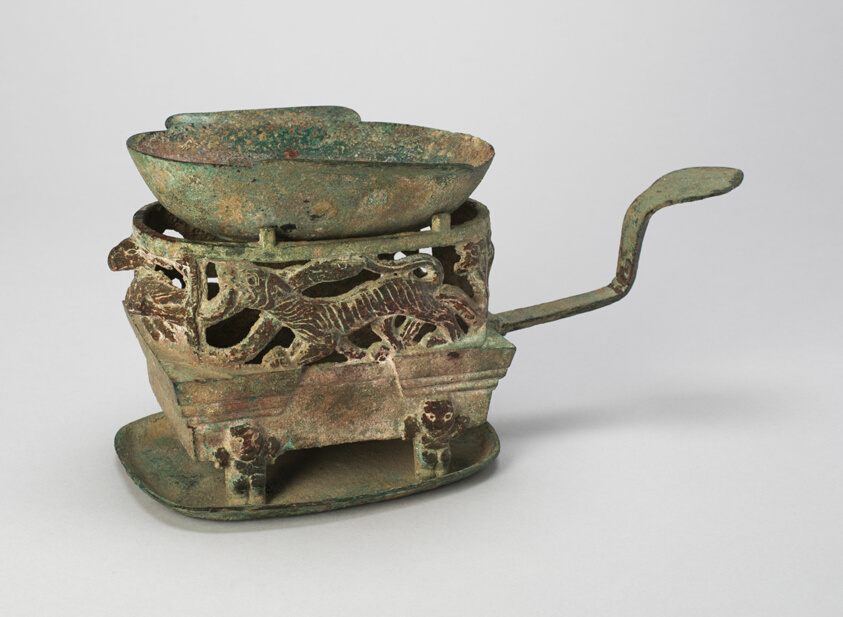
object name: Vessel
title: Pair of Braziers with Eared Cups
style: Chinese (culture or style)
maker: China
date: Han dynasty (206 BCE–220 CE), 100 BCE–100 CE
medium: Bronze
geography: China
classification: cookware; bronze; drinking vessel; metalwork; asian art; vessel